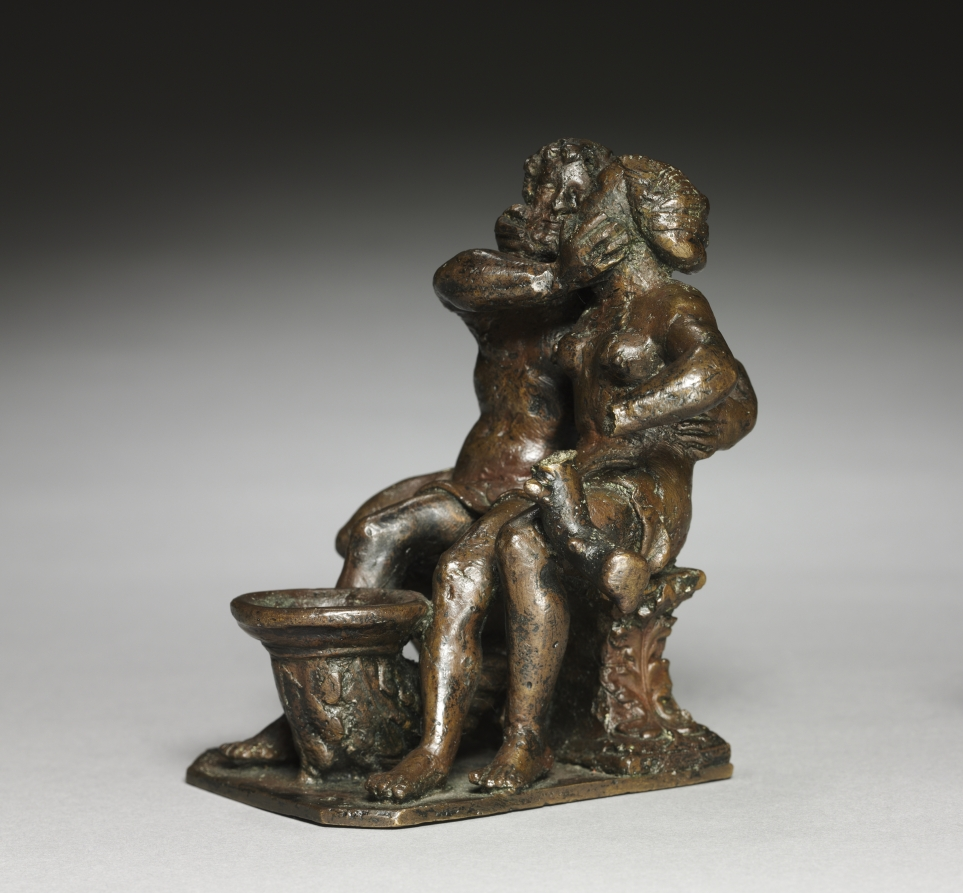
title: Adam and Eve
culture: Germany, Nuremberg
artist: workshop of Peter Vischer (German, 1487–1528)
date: c. 1520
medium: bronze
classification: Sculpture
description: The figures of Adam and Eve embrace on a bench. Together, the figures straddle an upright cornucopia that is meant to serve as an inkwell. The drapery strewn across the figures' laps—and thus covering their genitals—suggests that the scene takes place after the Fall. One can see a remnant of the Tree of Life to the right of Eve. Numerous bronze inkwells of the period survive, though they usually feature a single figure, usually allegorical, and not such an elaborate composition as seen here. This inkwell was formerly in the collection of the Duke of Arenberg, a noble house of the Habsburg Netherlands. The Vischers (Hermann I, Peter the elder, Hermann II, Peter the younger, Hans, Jakob, Paulus, and Georg) were the most renowned bronze casters of Renaissance Nuremberg, and had drawn patrons from across Europe. Because of certain ambiguities in its style, in the past the inkwell had been attributed to Georg Vischer. Stylistically, it resembles some of the miniature figures in Peter Vischer the younger's Shrine of St. Sebald (Church of St. Sebald, Nuremberg), portions of which had been cast at approximately the same time. South German bronze foundries in the sixteenth century would often adapt stylistic elements of Venetian bronzes to suit local tastes, and this inkwell is a product of this phenomenon.